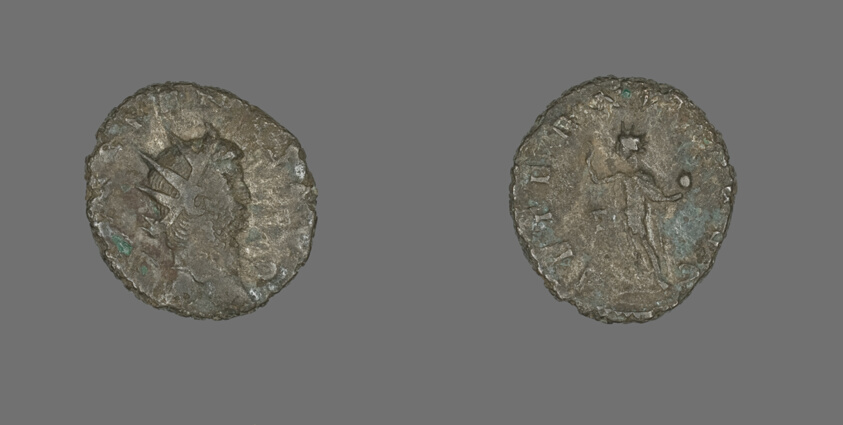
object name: Coin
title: Antoninianus (Coin) Portraying Emperor Gallienus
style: roman (ancient, style or period)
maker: Roman, minted in Rome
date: 260-268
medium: Billon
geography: Roman Empire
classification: coin; ancient art